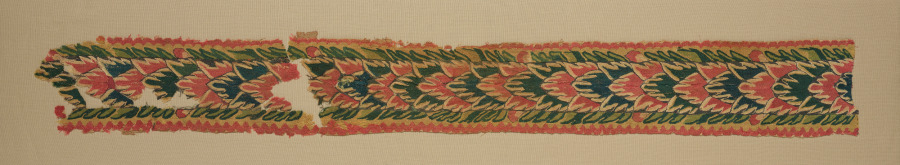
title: Panel from a Large Curtain, Overlapping Leaves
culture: Egypt, Byzantine period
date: 300s–400s CE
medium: Undyed linen and dyed wool: tapestry weave sewn on plain weave ground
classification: Textile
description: These colorful overlapping leaves with interspersed buds along the sides originally formed a decorative panel in a large curtain. Together with several similar designs, they alternated with areas of undyed linen decorated with scattered wool and linen tapestry-woven motifs. Although decorative motifs were often woven into the ground fabric, this panel was sewn on afterwards. During the late Roman and early Christian period curtains with woven or applied decoration were used in churches and Christian meeting rooms to separate the clergy from the congregation. They were also hung in doorways and between columns both inside and outside. Their importance is evident in numerous portraits of religious figures and laymen represented between curtained arches.